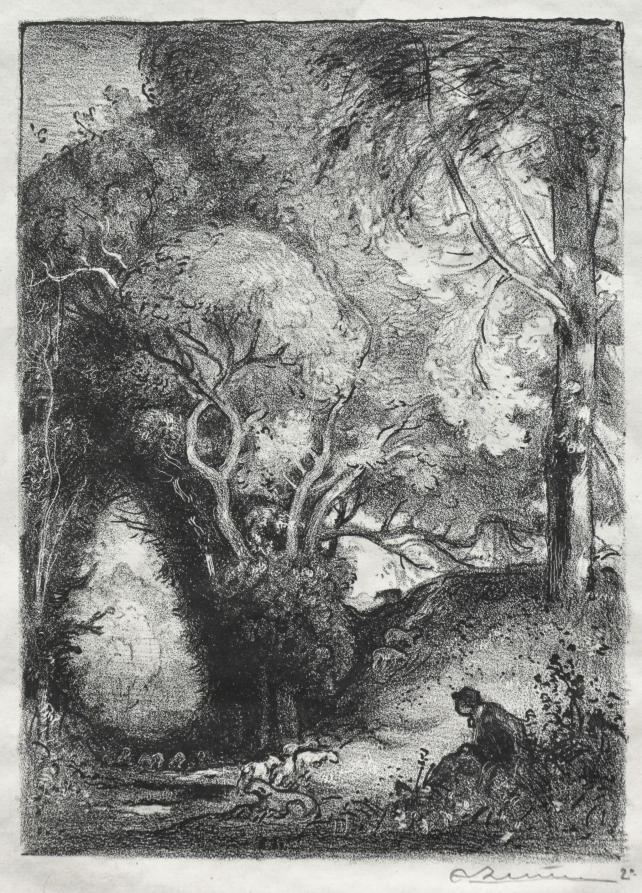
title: The Ravine in June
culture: France, 19th century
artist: Auguste Louis Lepère (French, 1849–1918)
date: c. 1870–1918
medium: lithograph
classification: Print